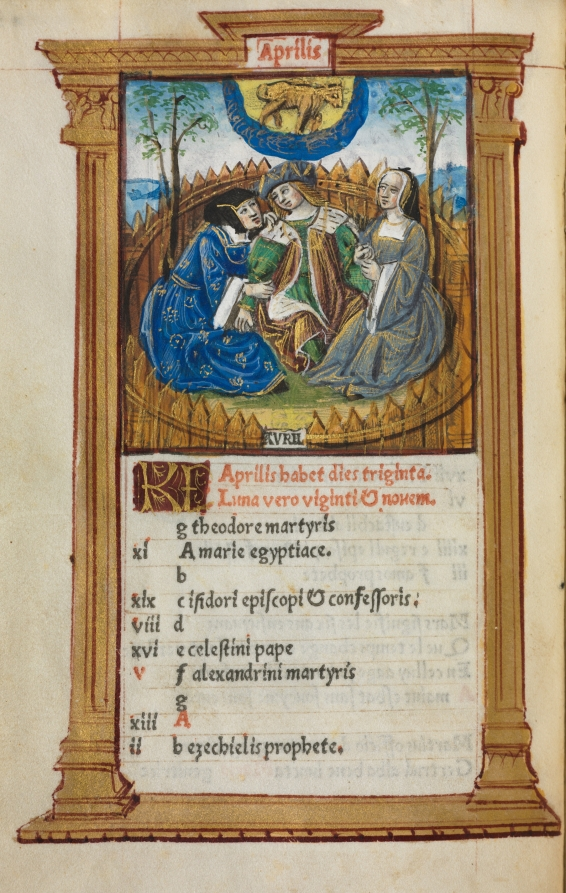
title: Printed Book of Hours (Use of Rome): fol. 5v, April calendar illustration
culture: France, Paris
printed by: Guillaume Le Rouge (French, Paris, active 1493–1517)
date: 1510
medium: 112 Printed folios on parchment, bound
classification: Bound Volume